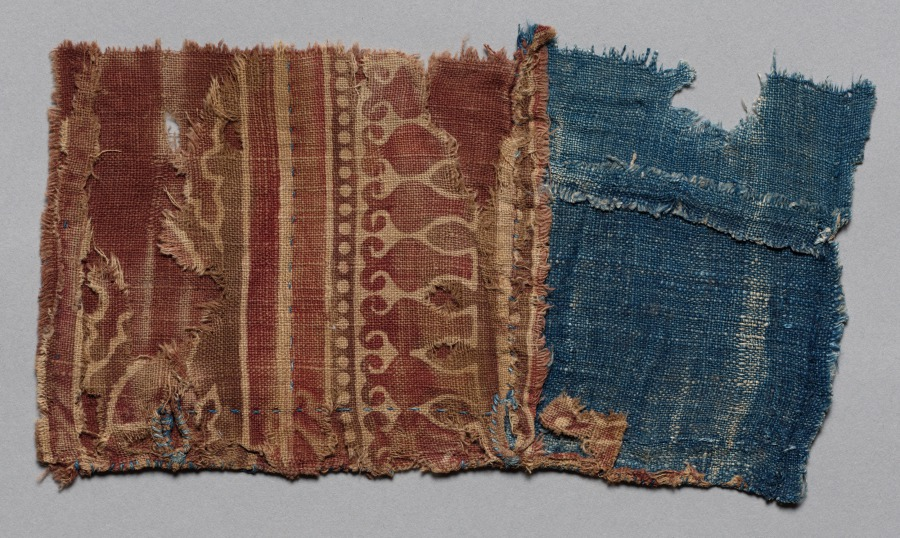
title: Fragment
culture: India, 12th-14th century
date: 1100s - 1300s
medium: plain cloth, resist dyed; cotton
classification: Textile